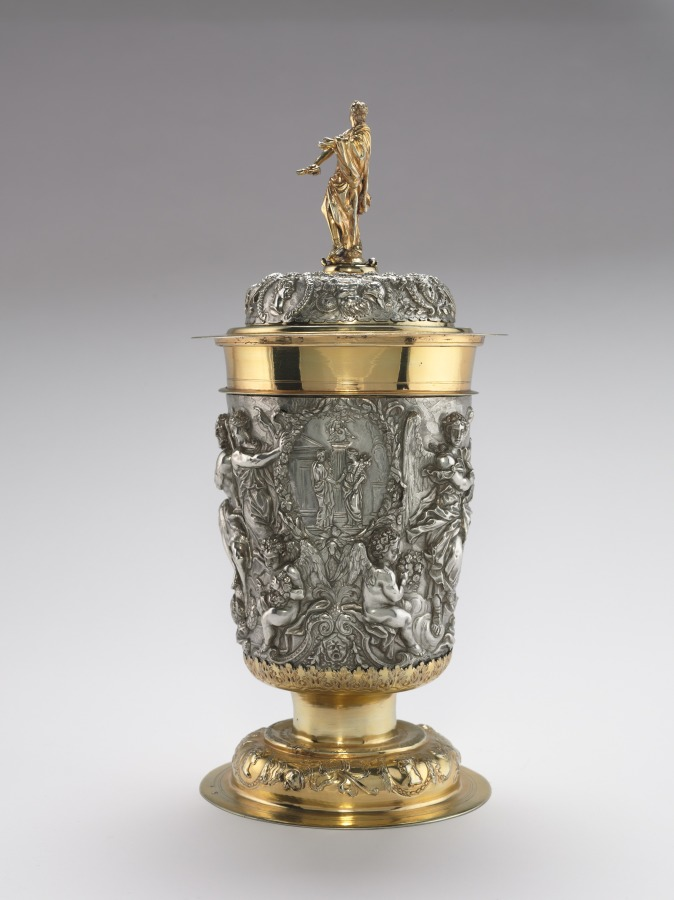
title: Covered Cup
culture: Germany, Augsburg, 17th century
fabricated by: Johann Andreas Thelot (German, 1655–1734)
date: 1688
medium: silver and gilt silver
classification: Metalwork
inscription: incised: J. A. Thélot. 1688.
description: Thelot was one of the most important silversmiths active in Germany in the late 1600s and early 1700s. The decorations of this cup refer to the defeat of the Turks in Central Europe in the 1680s.